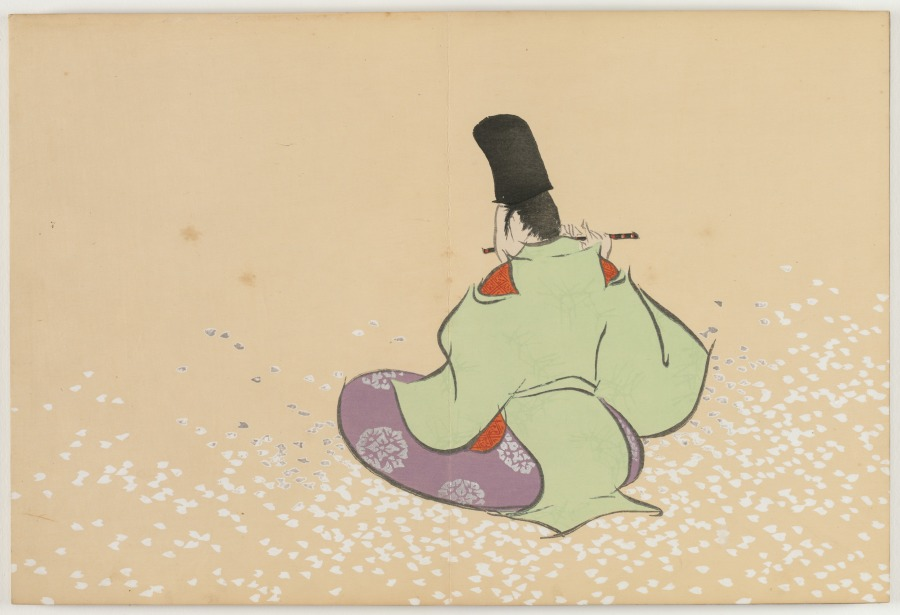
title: Flowers of a Hundred Worlds (Momoyogusa): Late Spring (Boshun)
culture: Japan, Meiji period (1868–1912)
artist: Kamisaka Sekka (Japanese, 1866–1942)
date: 1909–10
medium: color woodcuts with gold and silver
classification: Bound Volume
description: This print from a set of three woodblock printed albums displays the graphic design prowess of Kamisaka Sekka. The images were first distributed one by one to subscribers to the series but later were reissued in bound form, like this book, for mass consumers. Each print features a vignette taken from nature or Japanese literature. Many of the scenes have a long history in Japan, originating in the 900s or 1000s and having been interpreted by all manner of artists since that time. Sekka’s selections hew closely to precedents from the Rinpa style originated by painter Tawaraya Sōtatsu (c. 1570–c. 1640) and calligrapher Hon’ami Kōetsu (1558–1637).